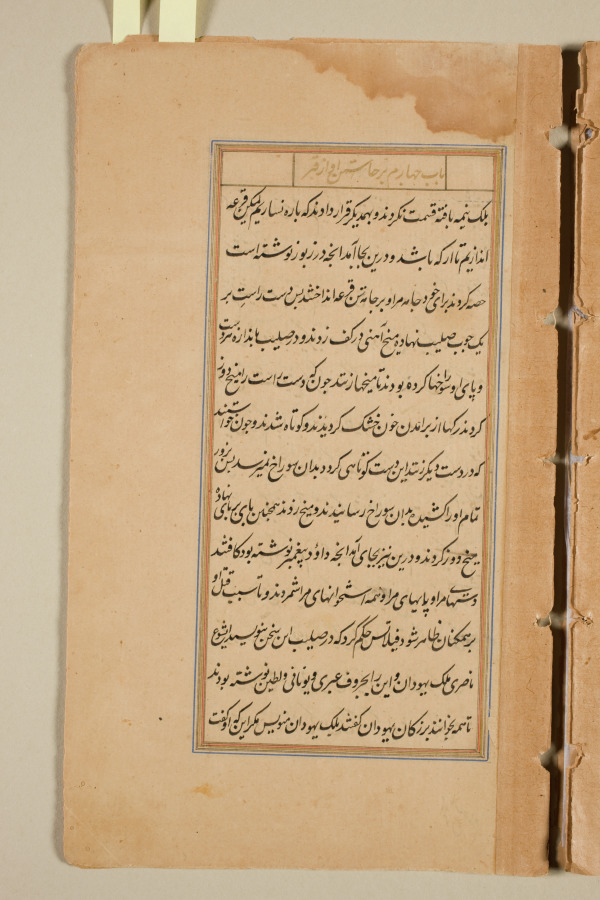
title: Text page from a Mirror of Holiness (Mir’at al-quds) of Father Jerome Xavier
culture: Mughal India, Allahabad, made for Prince Salim (1569–1627)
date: 1602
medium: Ink and gold on paper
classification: Manuscript